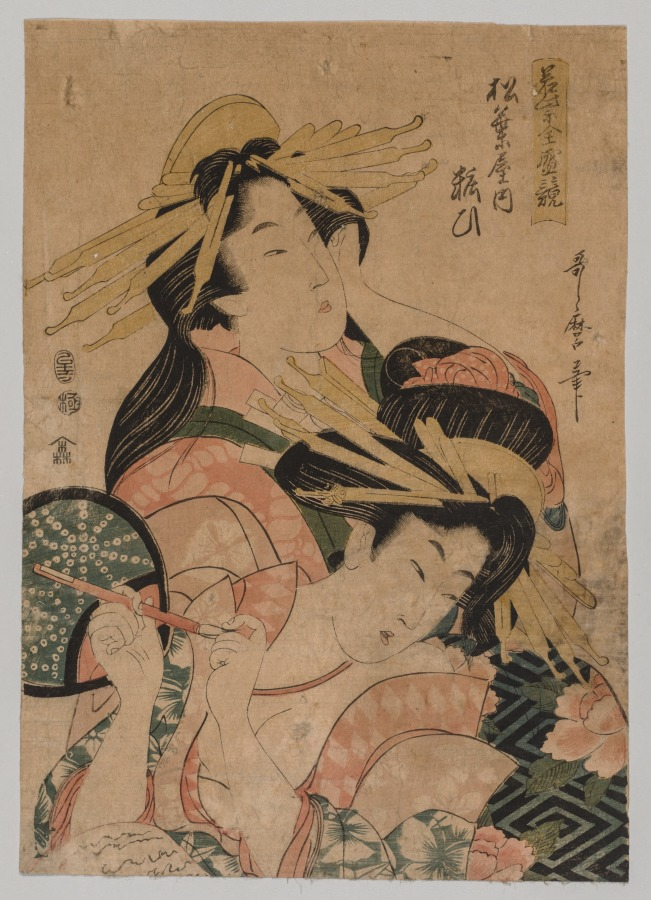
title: Half-length Portrait of Two Courtesans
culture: Japan, Edo period (1615–1868)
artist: after Kitagawa Utamaro (Japanese, c. 1754–1806)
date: 1753–1806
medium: color woodblock print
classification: Print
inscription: Signature: Utamaro fude Publisher Mark: Mori-ji (Jihei)